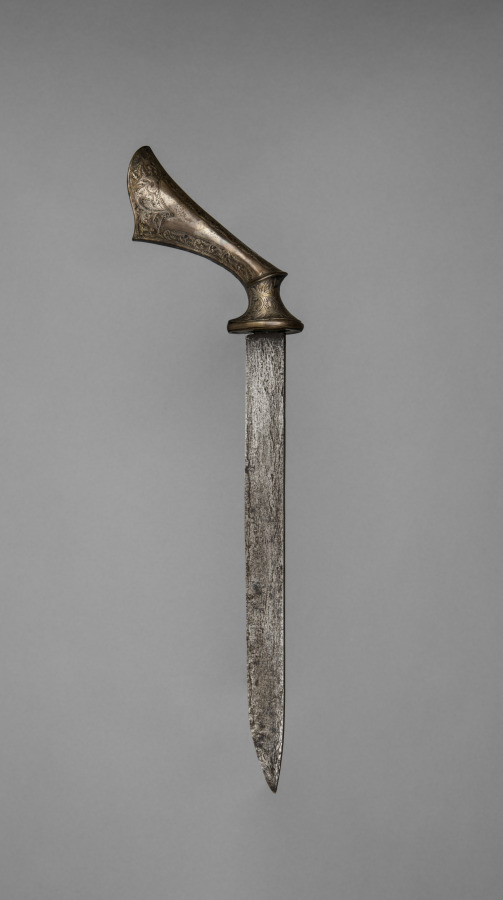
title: Knife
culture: Sumatra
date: 1500s–1800s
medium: Blade: steel; handle: copper alloy with silver gilt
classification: Arms and Armor